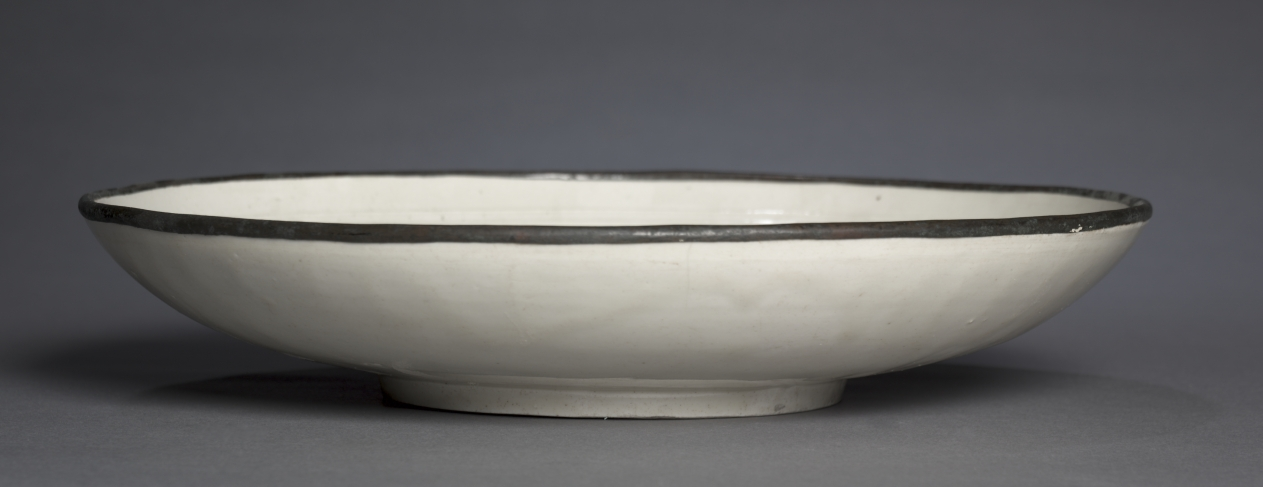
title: Dish: Ding ware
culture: China, Hebei province, Jin dynasty (1115-1234)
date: 1100s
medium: glazed grayish-white porcelain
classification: Ceramic